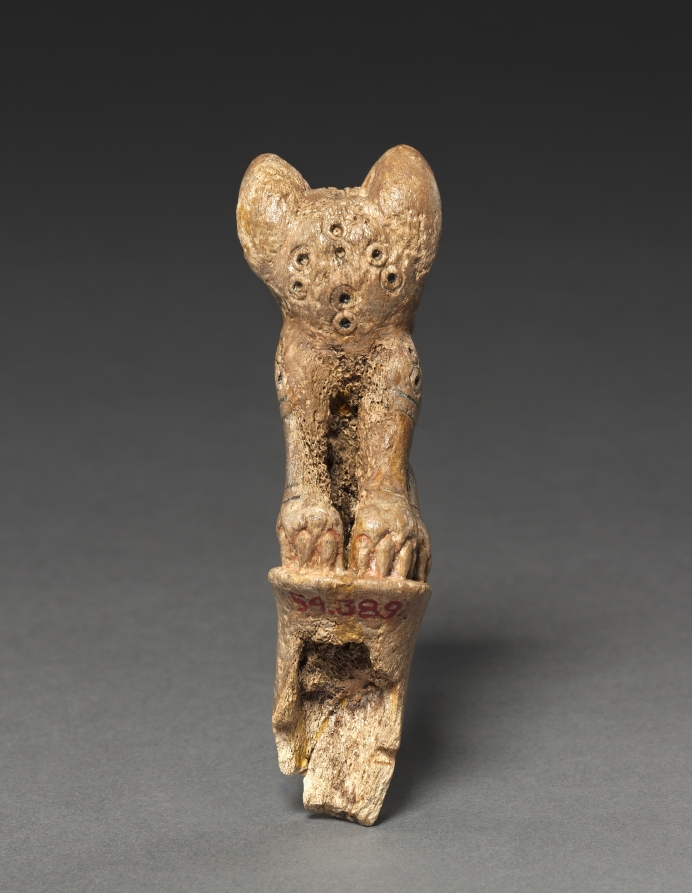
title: Handle of a Throwing Stick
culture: Peru, South Coast, Tiwanaku style, 400-1000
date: c. 700–900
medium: bone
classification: Arms and Armor